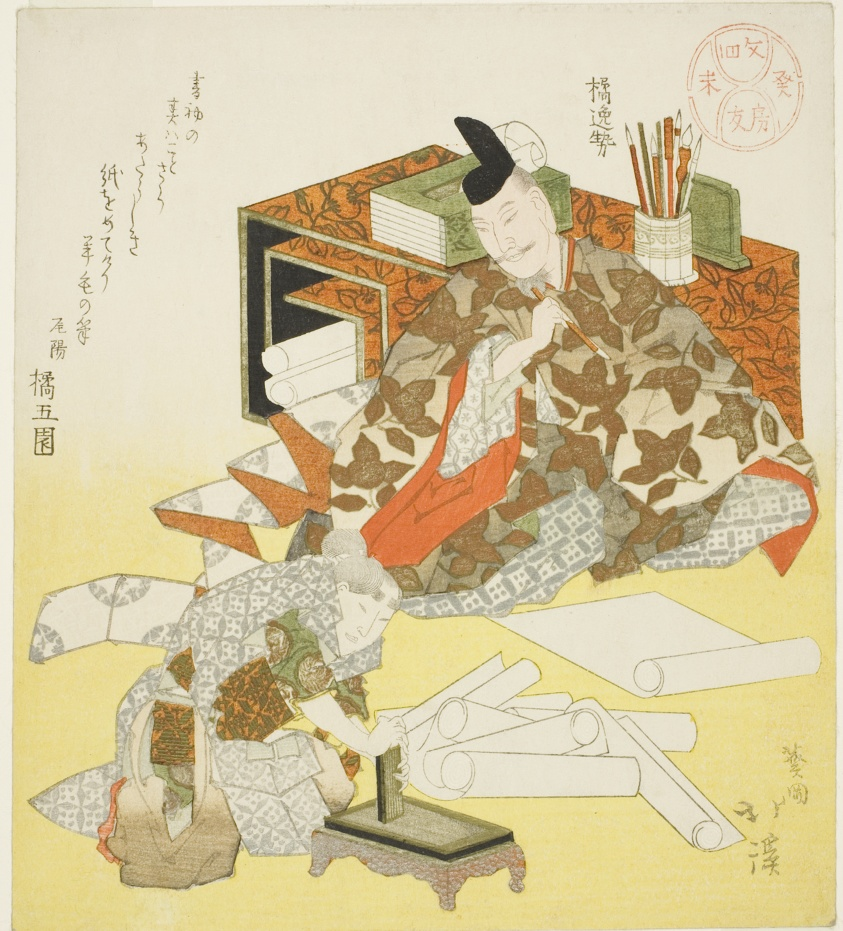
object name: Print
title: Tachibana no Hayanari preparing to make the first writing of the New Year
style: Japanese (culture or style)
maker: Totoya Hokkei (Japanese, 1780-1850)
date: 1823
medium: Color woodblock print; shikishiban, surimono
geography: Japan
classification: woodblock print; print; asian art